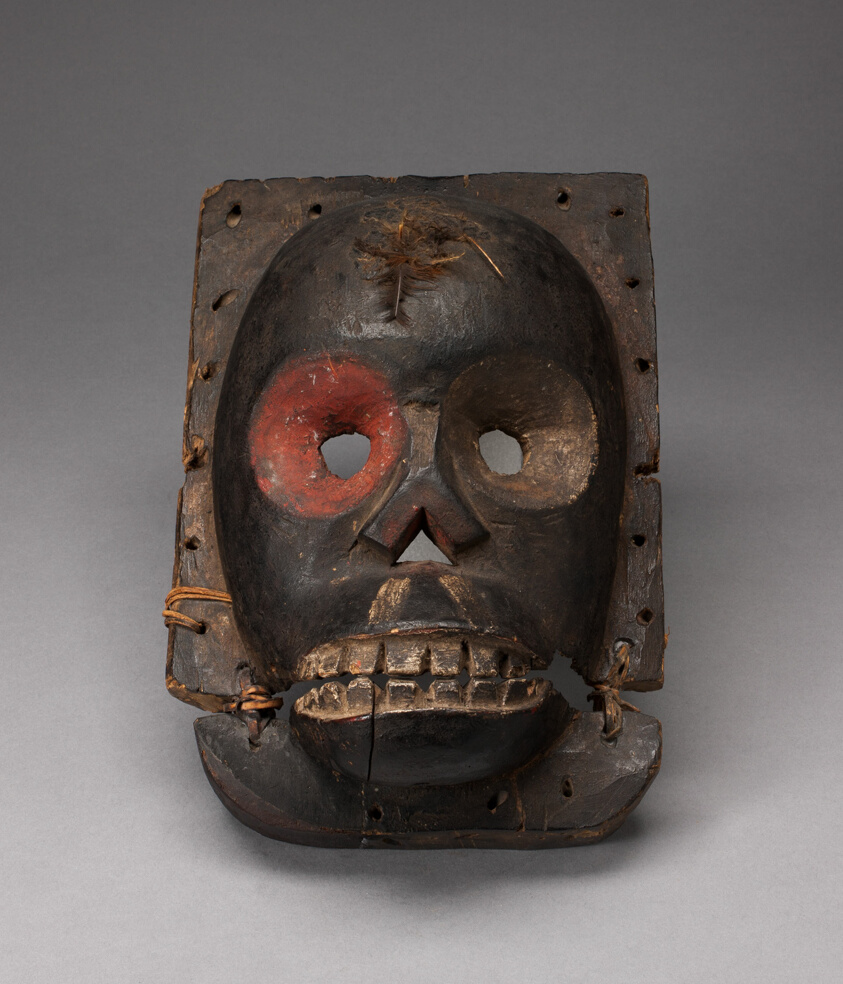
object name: Mask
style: ibibio, Arts of Africa, african Art, Coastal West Africa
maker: Ibibio; Nigeria; Coastal West Africa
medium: Wood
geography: Nigeria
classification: wood; arts of Africa; masks; african art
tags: masks